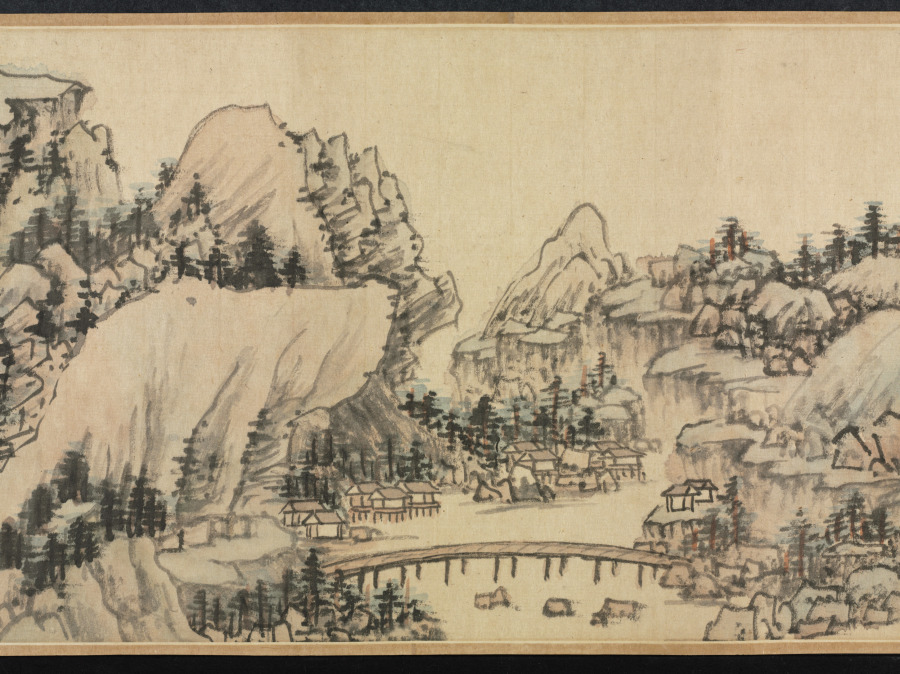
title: Dream Journey among Rivers and Mountains, no. 90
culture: China, Qing dynasty (1644-1911)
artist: Cheng Zhengkui (Chinese, 1604–1676)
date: 1658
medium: Handscroll; ink and color on paper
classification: Painting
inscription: 江山臥遊圖其九十, 青溪道人, 戊戌夏五。 [印] 程正揆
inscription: Title and inscription by Huang Yi 黃易 (1744–1802), and 3 seals.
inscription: 1 colophon and 9 additional seals: 3 seals of Dai Zhi 戴植 (active about 1821–1850); 1 colophon, dated 1914, and 3 seals of Yan Shiqing 顏世清 (1873–1929); 3 seals of Wang Nanping 王南屏 (1924–1985).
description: Cliffs and waterfalls interspersed with trees and dotted vegetation are spread over this handscroll. Long paths wind their way through villages, beside cottages, shrines, and over bridges. In the past, Chinese literati officials liked to take a “dream journey” along mountains and rivers when viewing landscape paintings in their studios. Scenery of this kind thus became a way to escape from the world of bureaucracy and administration. The painter Cheng Zhengkui used the title “Dream Journey” for a whole series of paintings, of which this is number 90. He is said to have painted 500 of them, but the actual count remains unknown.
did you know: Cheng Zhengkui planned to make 100 dream journey paintings but may have ultimately made 500.